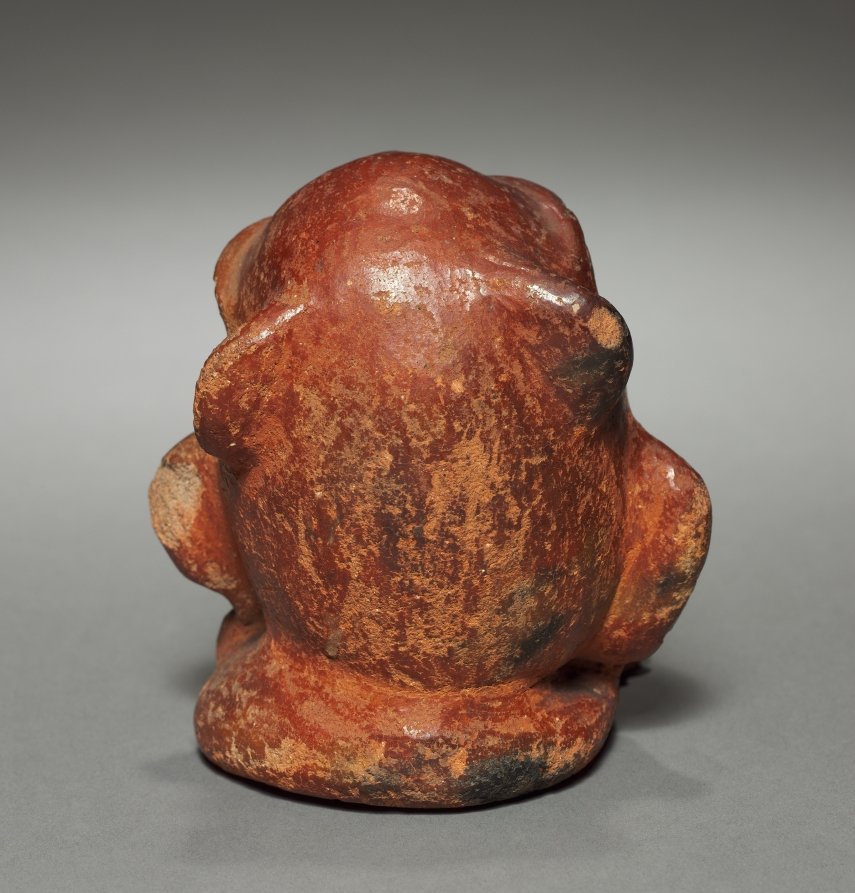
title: Grotesque Figure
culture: Colombia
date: before 1921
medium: red ware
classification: Ceramic